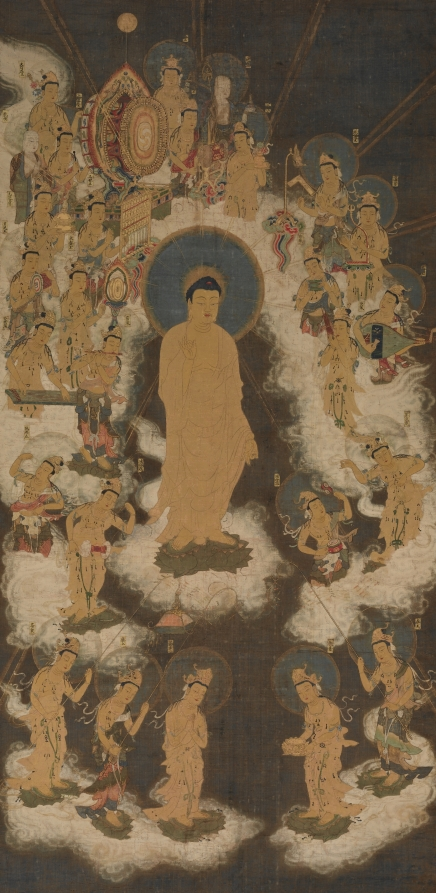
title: Welcoming Descent of Amida (Amida Raigō)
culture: Japan, Kamakura period (1185–1333)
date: 1300–1333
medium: hanging scroll; ink, color and gold on silk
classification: Painting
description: In the Pure Land school of Buddhism, Amida Buddha is the focus of worship. Pictured here is the raigō, or the moment when Amida descends with his retinue to welcome a dying person into his Pure Land, called the Western Paradise. Once there, a person can concentrate on becoming enlightened. Images like this one could be placed before a person on their deathbed to help them stay faithful and motivated to attain birth in the Pure Land.